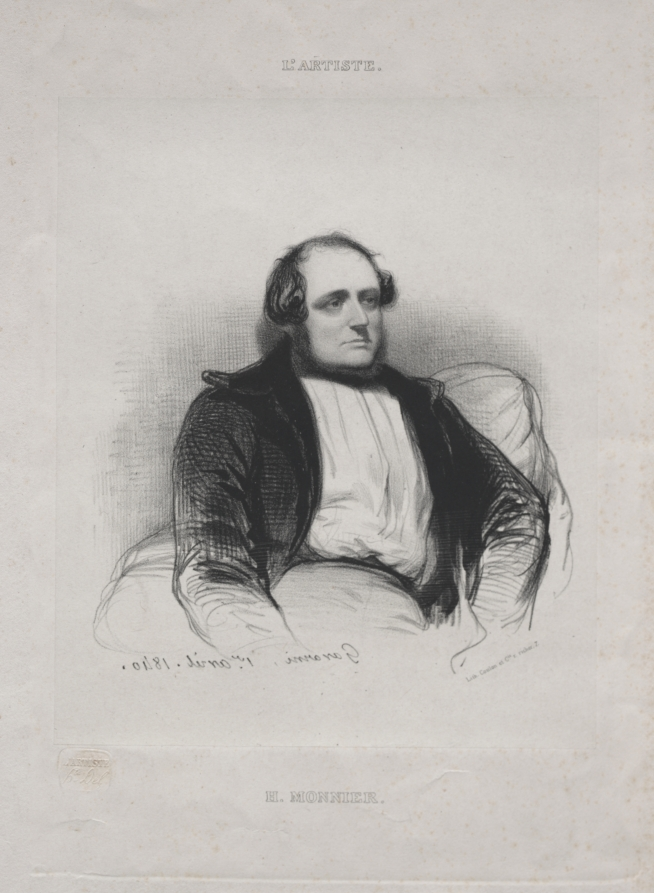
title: Henri (Bonaventure) Monnier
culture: France, 19th century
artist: Paul Gavarni (French, 1804–1866)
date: 1840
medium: lithograph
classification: Print